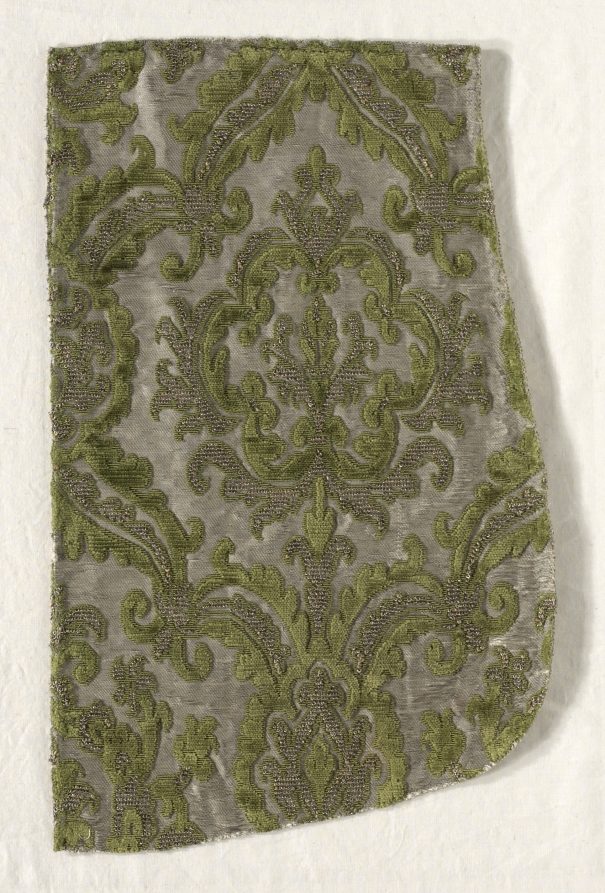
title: Fragment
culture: Spain, second half of 16th century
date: second half of 16th century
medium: brocaded silk with metal thread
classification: Velvet